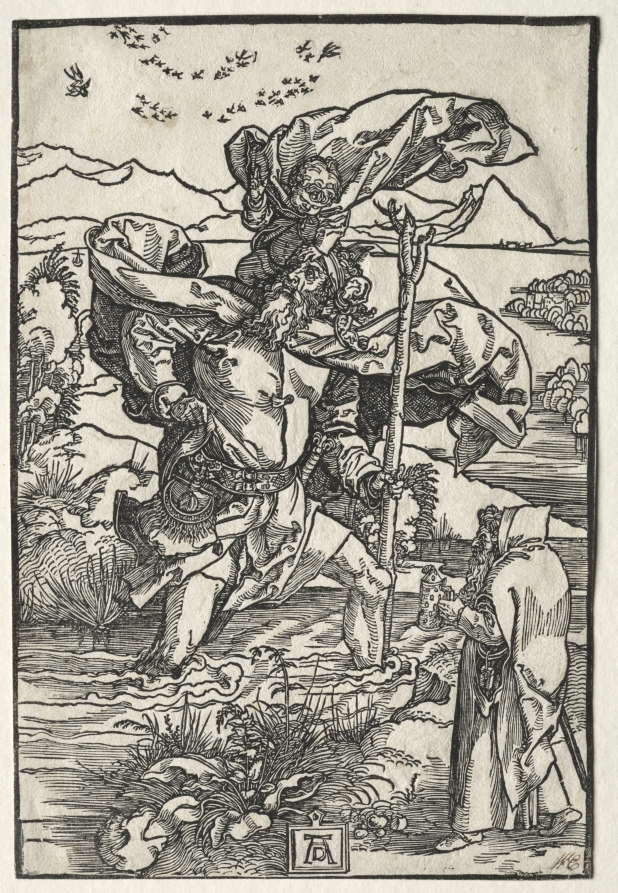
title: St. Christopher with the Birds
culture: Germany, late 15th-early 16th Century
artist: Albrecht Dürer (German, 1471–1528)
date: c. 1501–4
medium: woodcut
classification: Print